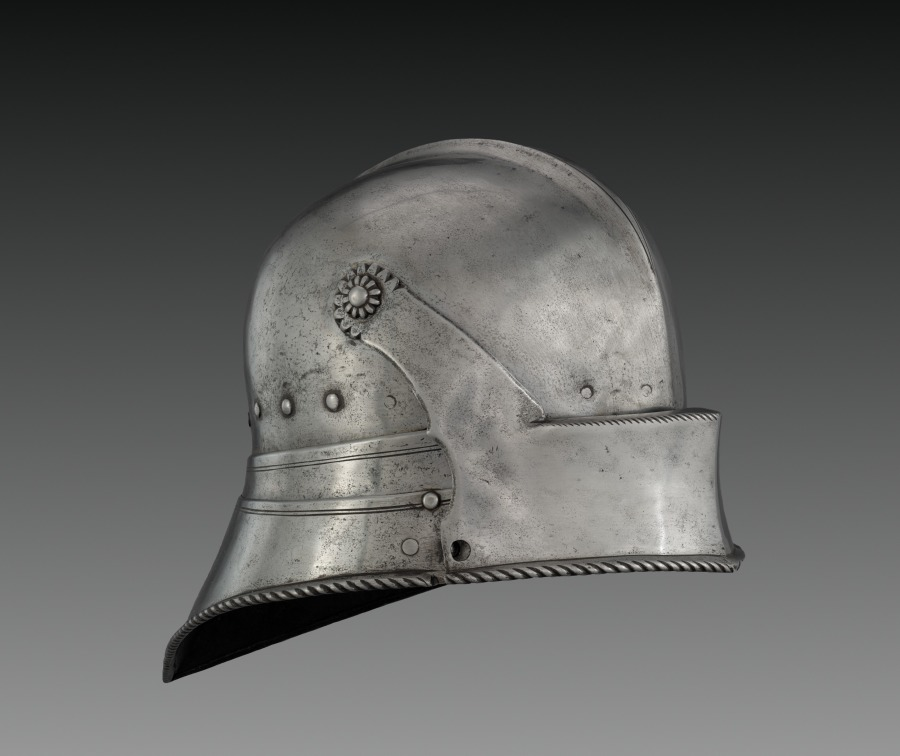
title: Visored Sallet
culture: Germany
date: c. 1490–1500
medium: steel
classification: Arms and Armor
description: The sallet is a partly open-face helmet common in Europe during the 1400s, used in both equestrian and infantry versions. Sallets with movable visors, like this example, are considered to be more technically and visually interesting; beautifully streamlined, it assumes a highly sculptural teardrop shape. Originally it would have been part of a complete suit of armor. The sallet became the quintessential helmet form of the late Middle Ages and is frequently represented in medieval miniatures and woodcuts.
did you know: Medieval sallets were design inspiration for modern-day fireman's helmets.